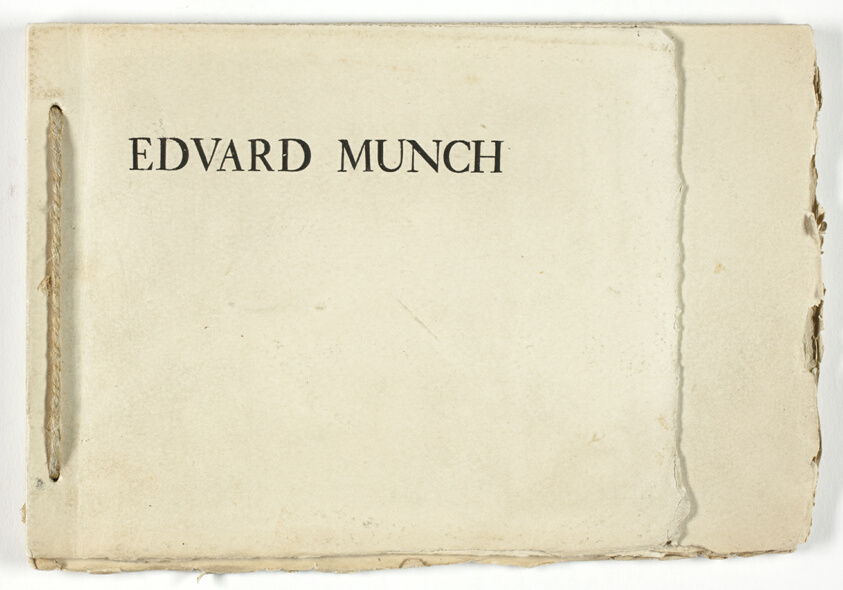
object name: Book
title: Text, from Meier-Graefe portfolio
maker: Edvard Munch (Norwegian, 1863-1944)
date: published 1895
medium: Book of fourteen sheets of text on irregularly sized heavy cream wove paper, bound with a simple cord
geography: Norway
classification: book; prints and drawing; print